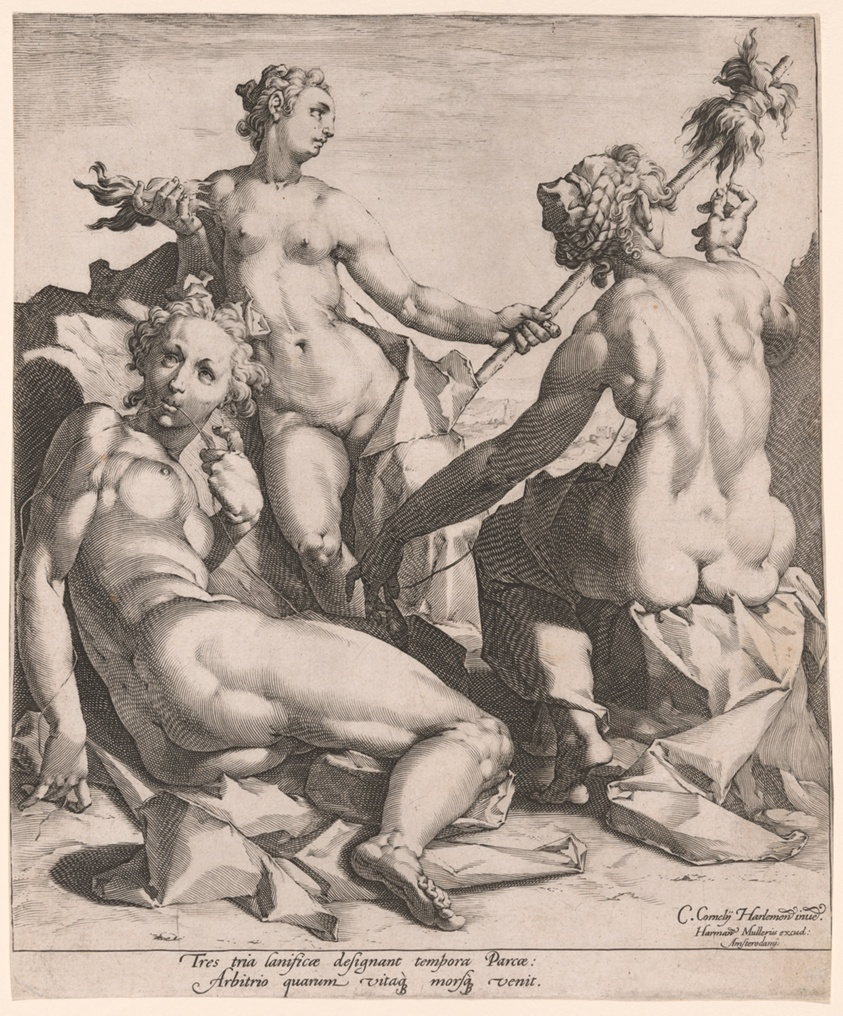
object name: Print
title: The Three Fates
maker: Jan Harmensz Muller (Dutch, 1571–1628); after Cornelis van Haarlem (Dutch, 1562–1638)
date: c. 1589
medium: Engraving in black on cream laid paper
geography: Netherlands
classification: print; paper; engraving; prints and drawing